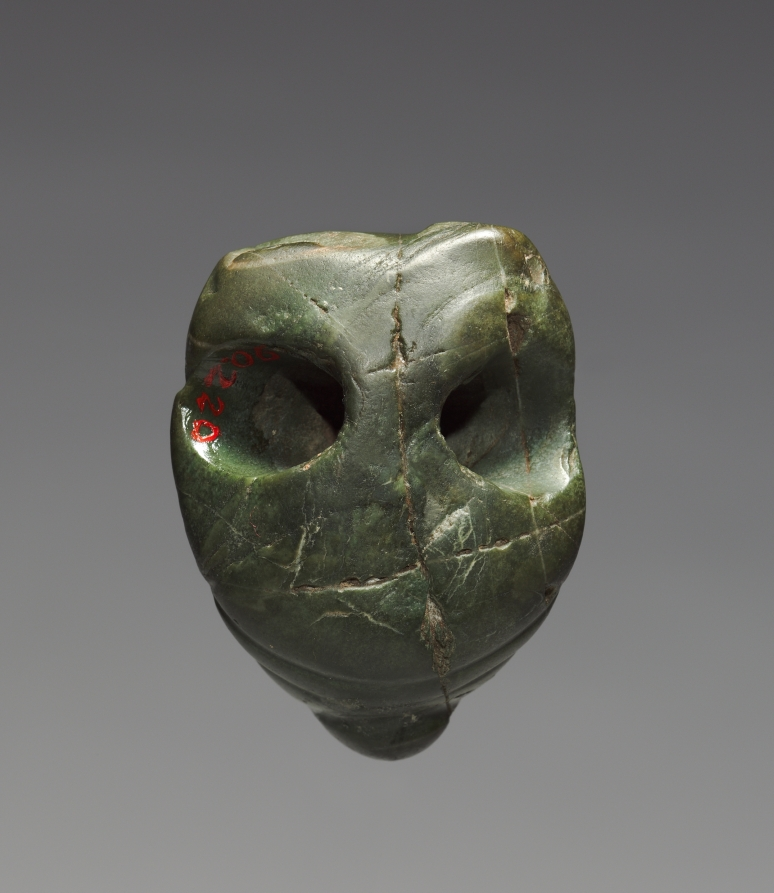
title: Head with Animal Headdress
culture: Mexico, Puebla, Matamoros region(?), Olmec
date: 900–300 BCE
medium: serpentine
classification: Sculpture